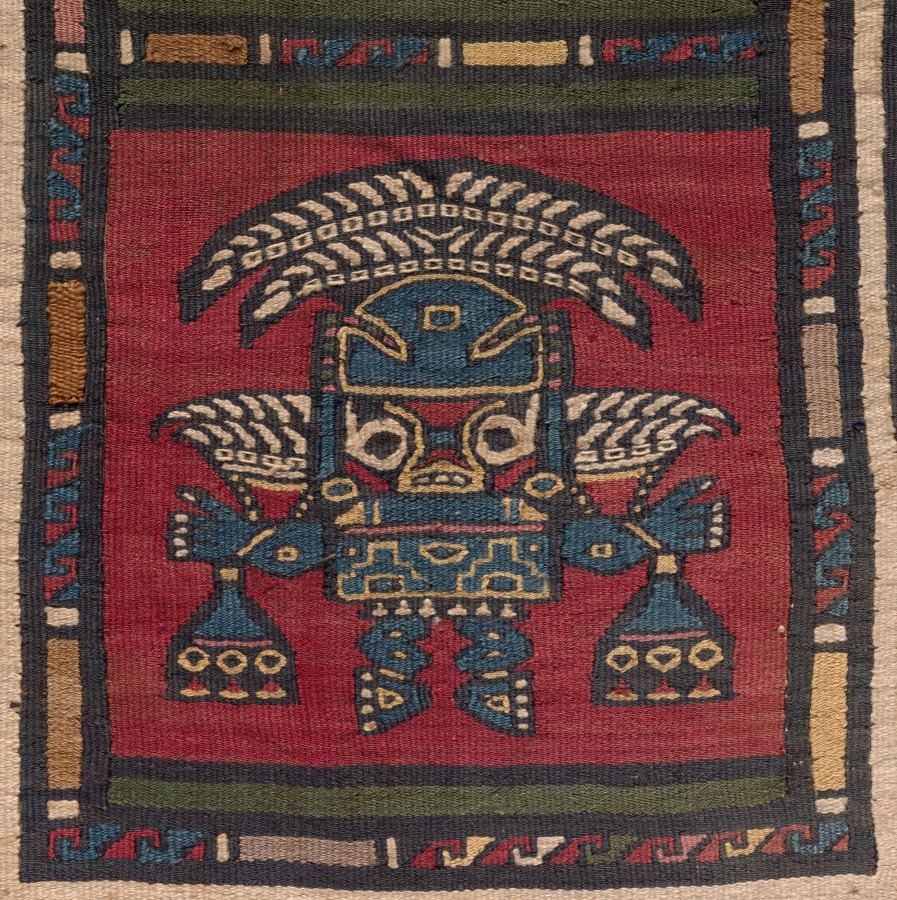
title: Tapestry Fragment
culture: Peru, North Coast, Lambayeque (Sicán) people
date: 700–1370s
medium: camelid fiber and cotton, tapestry weave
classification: Tapestry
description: The prominent figure with an elaborate headdress duplicated on this brightly colored fragment is known today as a “Lord,” a term that reveals uncertainty about his identity but confidence in his prestige. Whether a king or a deity, he was crucially important to the north coast Lambayeque (lahm-buy-yek-kay) (Sicán) people, who often portrayed him in a wide range of media. The geometric motif that repeats in the nine central squares is unidentified.